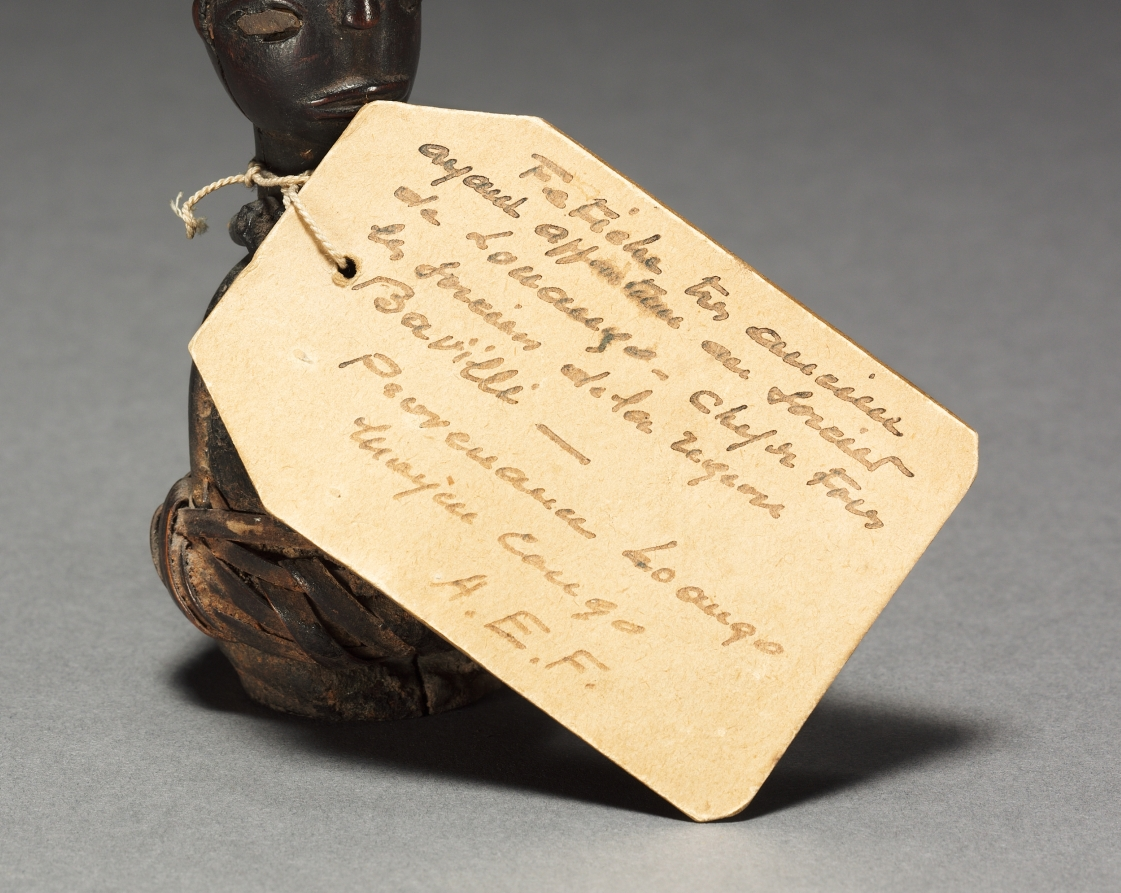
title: Power figure (nkisi)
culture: Central Africa, Republic of the Congo, Kongo people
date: late 1800s-early 1900s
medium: Wood, organic materials (including resin), iron, reed, tooth, seashell or glass beads, and possibly plastic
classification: Sculpture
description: One of seven anthropomorphic figurines, these minkisi contained medicines in which an ancestral spirit was believed to reside. Minkisi were objects of communal use; if conflict arose between two citizens, the Nkisi figure, along with the nganga (ritual leader) helped resolve the dispute. This small figure belonged to “the sorcerer of Loango,” chief of all sorcerers of that region (a province and port in West Central Africa).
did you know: This small figure belonged to “the sorcerer of Loango,” chief of all sorcerers of that region (a province and port in West Central Africa).